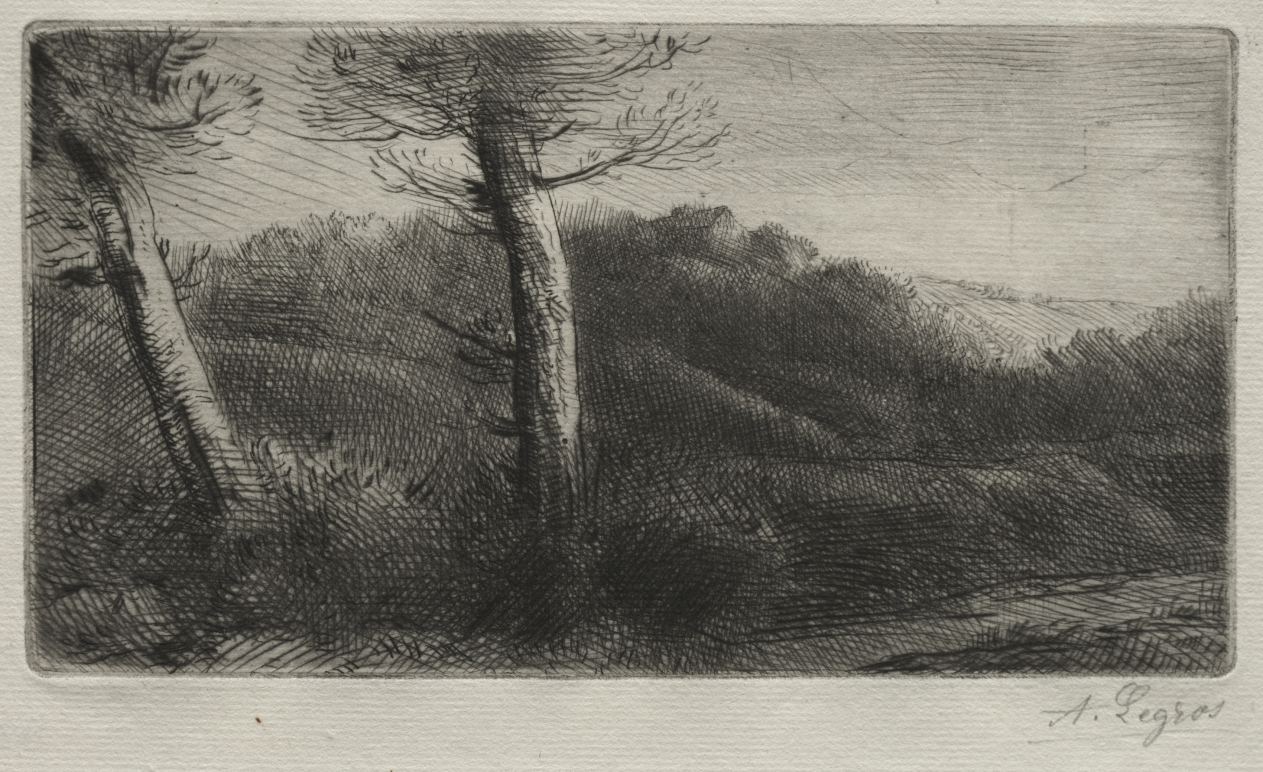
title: Sunset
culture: France, 19th-20th century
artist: Alphonse Legros (French, 1837–1911)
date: c. 1857–1911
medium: etching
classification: Print